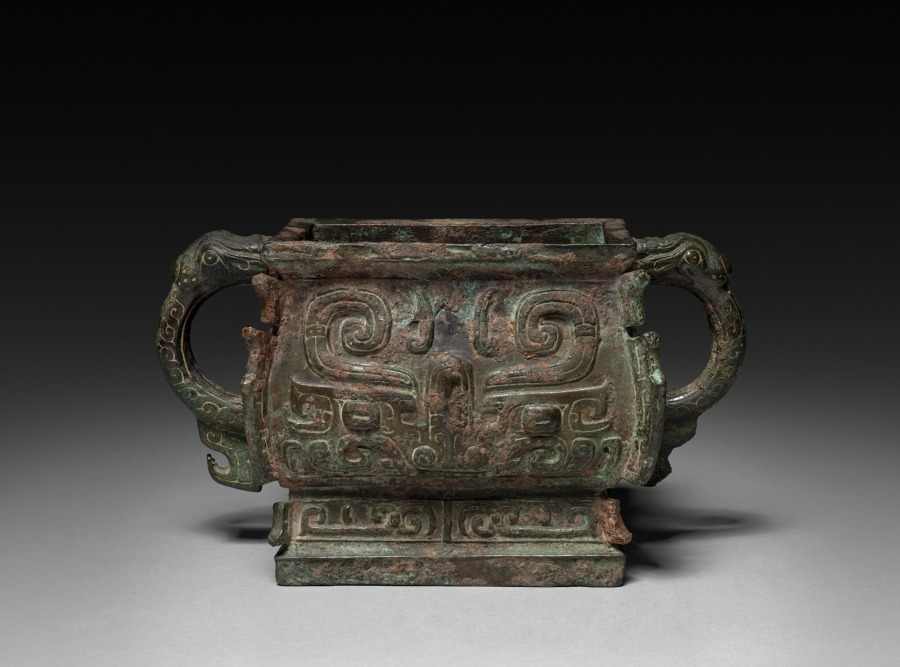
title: Kuei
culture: China, Western Zhou dynasty (c. 1046–771 BCE)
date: 1045–771 BCE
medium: bronze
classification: Metalwork